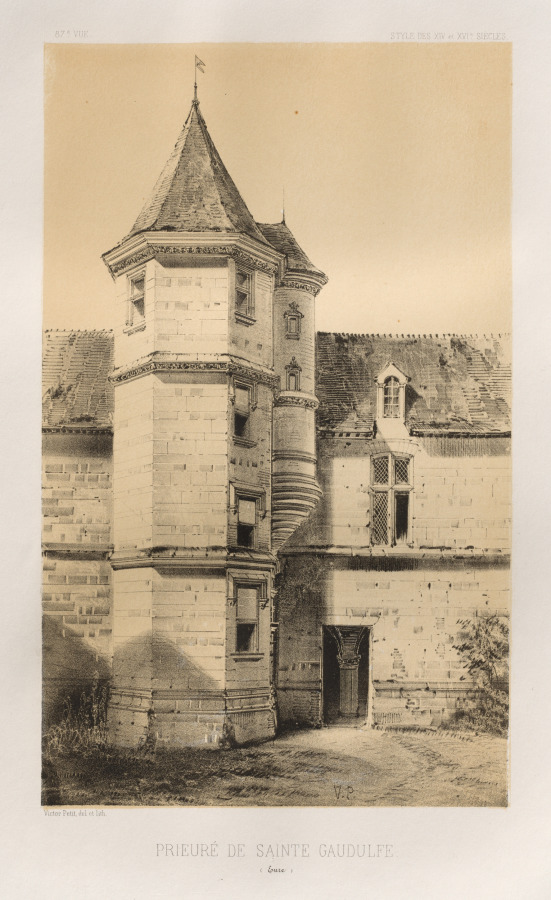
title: Architecture Pittoresque ou Monuments des XVeme. Et XVIeme. Siecles: Chateaux de France des XV et XVI Siecles: Pl. 87, Prieuré de Sainte Gaudulfe (Eure)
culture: France, 19th century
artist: Victor Petit (French, 1817–1874)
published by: Charles Boivin (publisher and editor); Lith de Godard a Paris (printer)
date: 1860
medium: lithograph with tint stone, from portfolio of 100 lithographs with tint stone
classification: Print